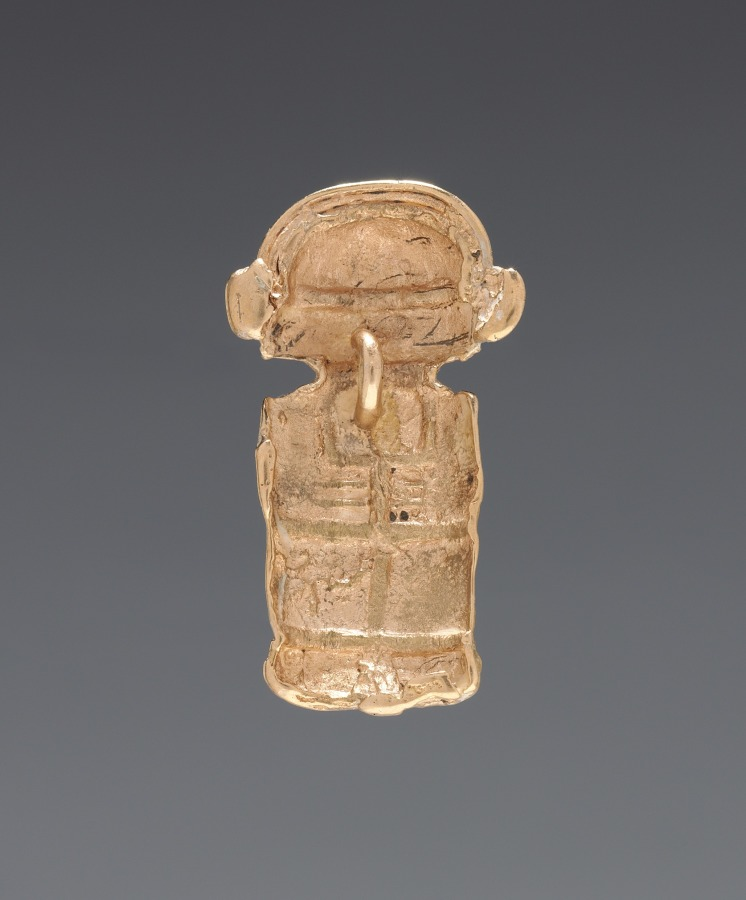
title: Necklace Figurine Bead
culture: Colombia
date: 1–700 CE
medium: cast gold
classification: Jewelry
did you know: Working with gold dates back to at least 500 BC in Ecuador and Colombia.